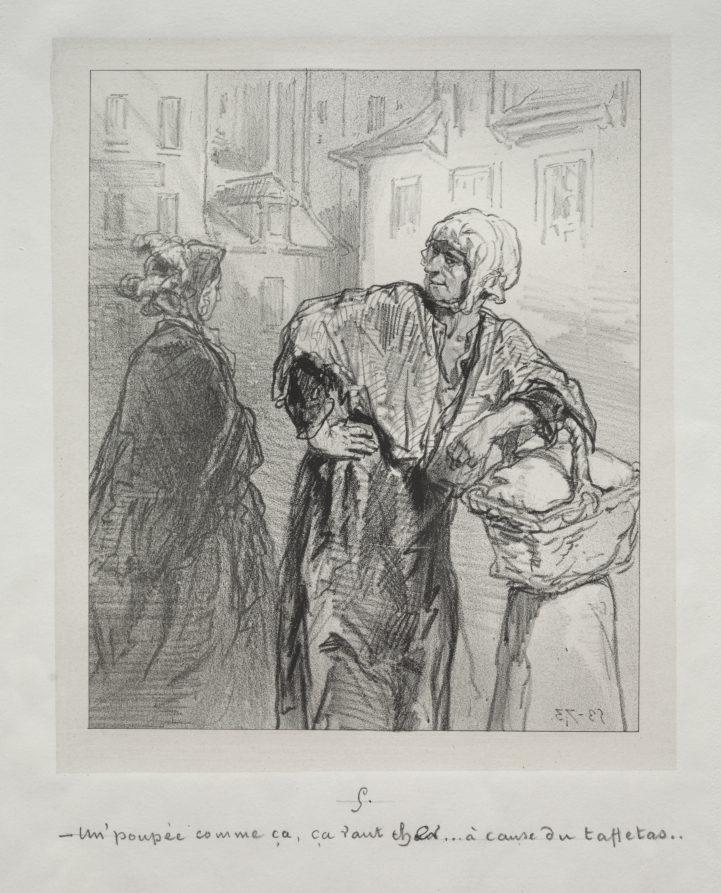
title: Les Petite Mordont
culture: France, 19th century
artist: Paul Gavarni (French, 1804–1866)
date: 1853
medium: lithograph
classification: Print